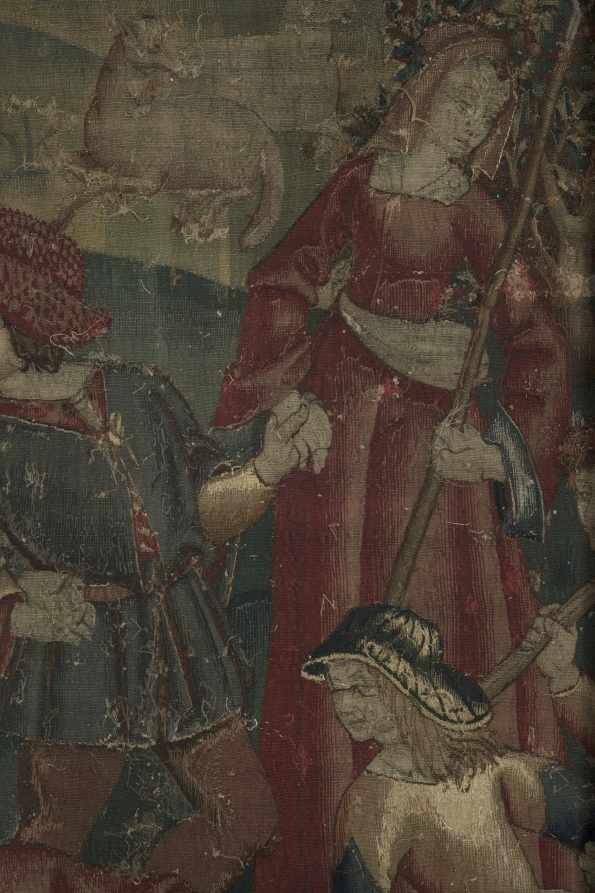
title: Shepherds in a Round Dance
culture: Netherlands, early 16th century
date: around 1500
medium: Wool and silk: tapestry weave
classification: Tapestry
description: Late medieval tapestries often use a limited yet contrasting color palette to portray stylized images. The expressions of these figures, for example, are conveyed more by their postures than by their faces. Four shepherds and shepherdesses join hands and dance to the music of a bagpiper at the far right, while a lord and two ladies on the left look on. A dog and sheep amid blossoming plants and trees contribute to the festive pastoral scene in front of a castle.